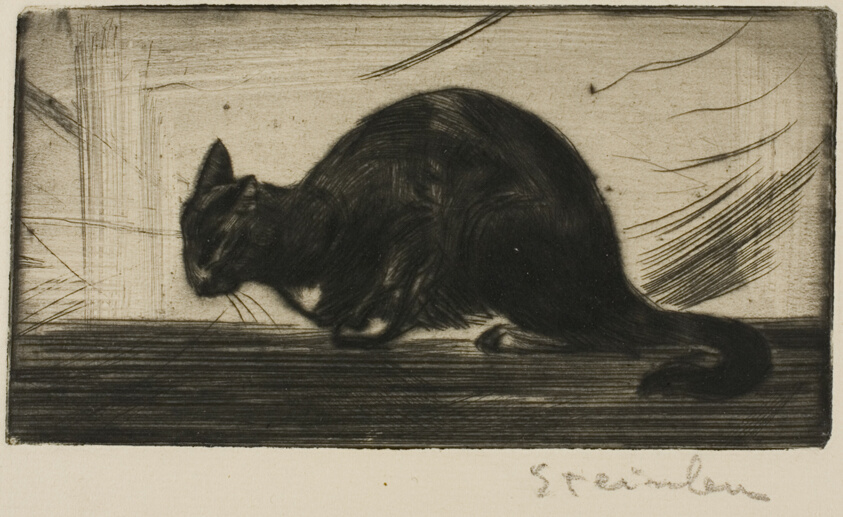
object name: Print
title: Cat Arching Its Back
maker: Théophile-Alexandre Steinlen; French, born Switzerland, 1859-1923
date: 1898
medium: Drypoint from a zinc plate on ivory laid paper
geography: France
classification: drypoint; print; prints and drawing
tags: cats, animals